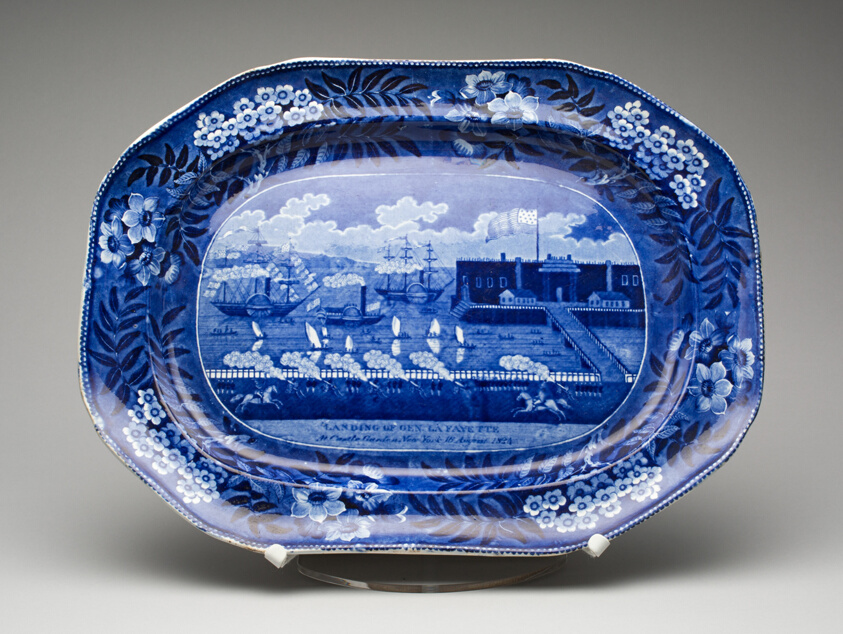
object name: Decorative Arts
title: Platter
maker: James and Ralph Clews; English, active 1818–36; Made for the American market; West Midlands, Stoke-on-Trent, England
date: 1824–36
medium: Earthenware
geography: Cobridge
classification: vessel for serving food; earthenware; dish (vessel); american decorative arts; ceramics; decorative arts